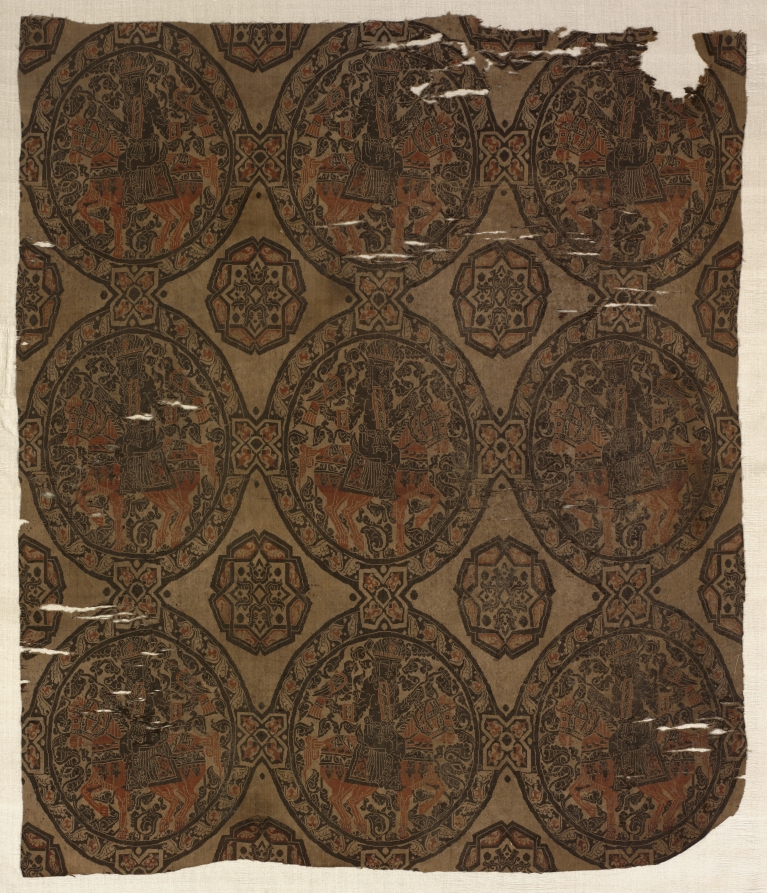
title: Fragment with Equestrian Falconer King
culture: Iran or Iraq, in the style of the Abbasid period (750–1258)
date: prior to 1971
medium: Silk: lampas weave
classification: Textile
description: In three rows, this fragment preserves nine complete aligned, tangent roundels, each containing a king on horseback with a falcon in his left hand and a leafy branch in his right. The border of each roundel is ornamented with a scrolling foliate vine. Interspaces contain oval medallions enclosing an eight-pointed star within which is a four-directional palmette. Joining the roundels at their cardinal points are cross-shaped geometric figures. According to recent analysis of the museum’s Buyid and Abbasid textile materials, some have been identified as modern reproductions.